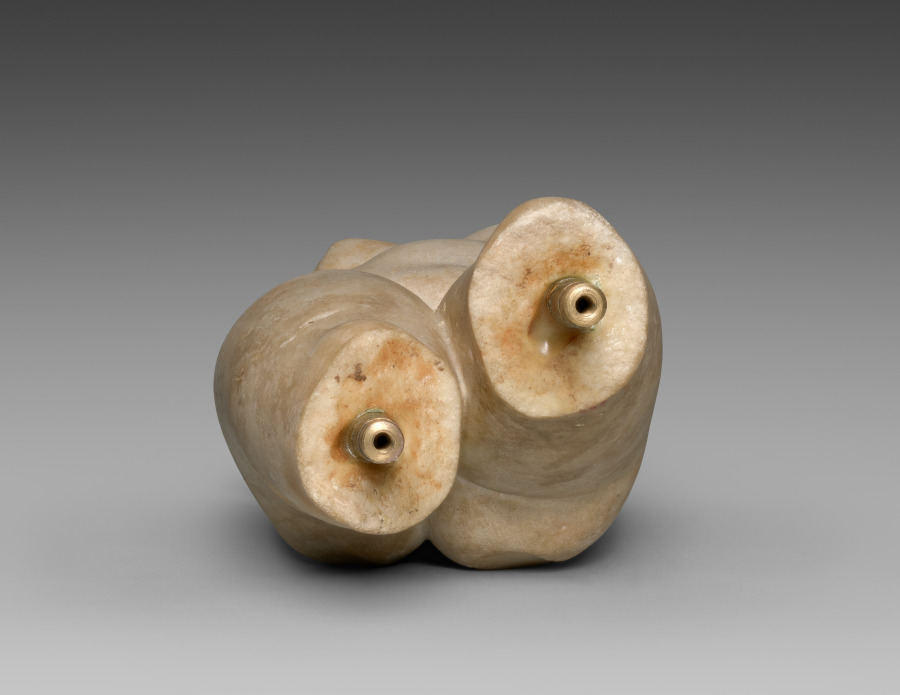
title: Torso of a Woman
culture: Italy, Roman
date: 100 BCE–400 CE, or modern, before 1927?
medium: marble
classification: Sculpture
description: Even without her head, limbs, or additional attributes, the nudity of this female statuette connects her to Aphrodite, goddess of love, or Venus, her Roman parallel. Female nudity was first realized in large scale in the mid-300s BC by the famous Athenian artist Praxiteles (395–330 BC), whose sculpture of Aphrodite was prominently displayed in a shrine in the city of Knidos (in present-day Turkey). For centuries thereafter, the female nude became a great favorite for Greek and Roman artists. The tradition continued into modern times, leading some to question the ancient origins of this sculpture.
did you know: The nudity of this female statuette connects her to Aphrodite or Venus, goddess of love.